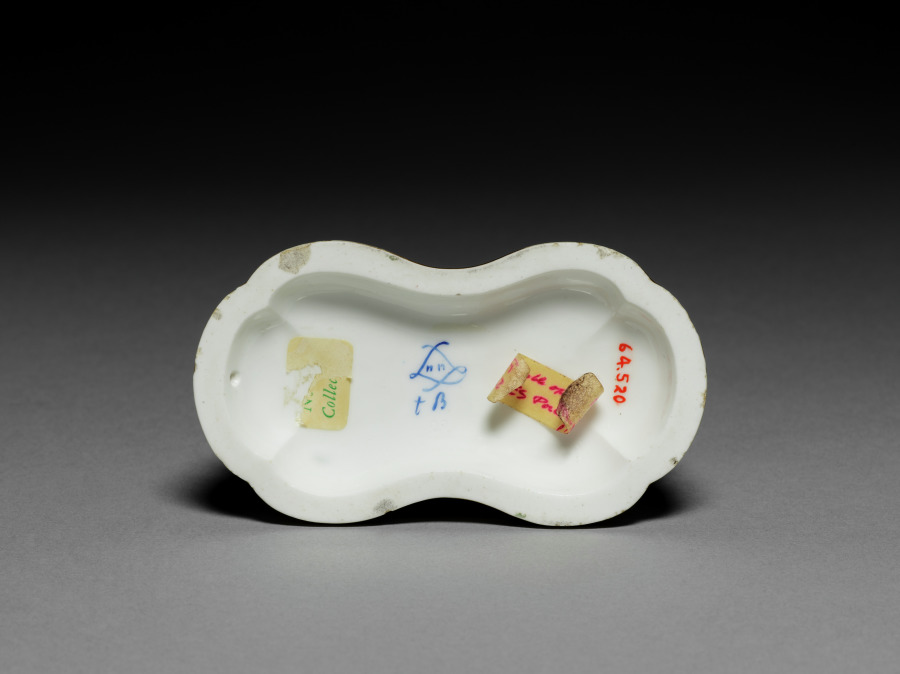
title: Double Salt Dish (Salière)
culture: France, Sèvres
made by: Sèvres Porcelain Factory (French, est. 1756)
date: 1790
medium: Hard-paste porcelain with enamel and gilt decoration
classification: Ceramic